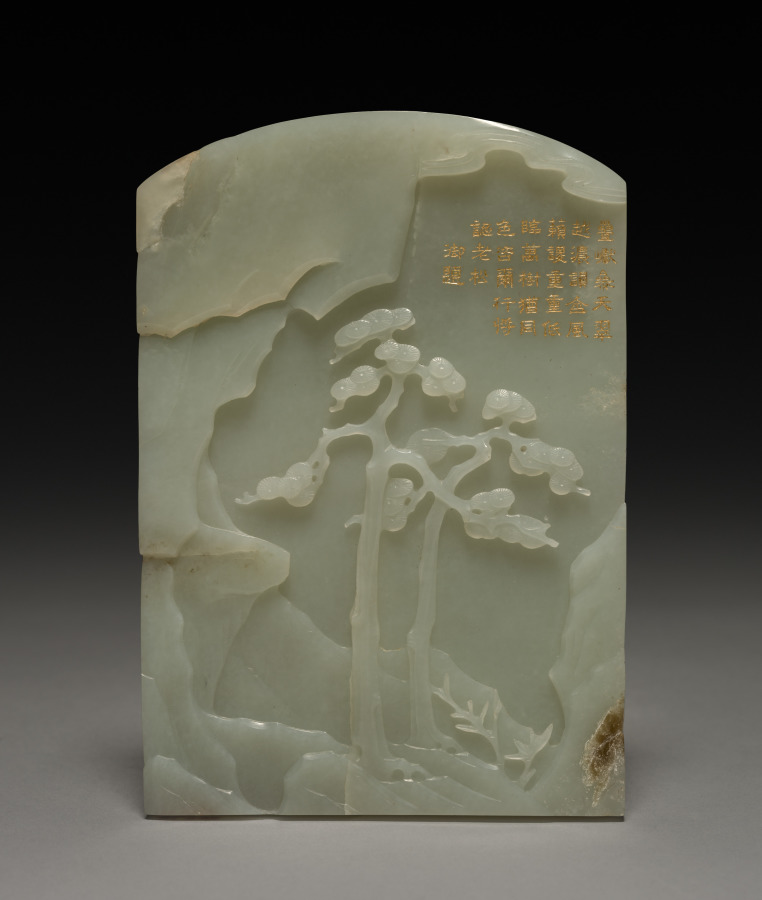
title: Table Screen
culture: China, Qing dynasty (1644–1911), Qianlong reign (1736–95)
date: 1736–95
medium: jade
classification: Jade